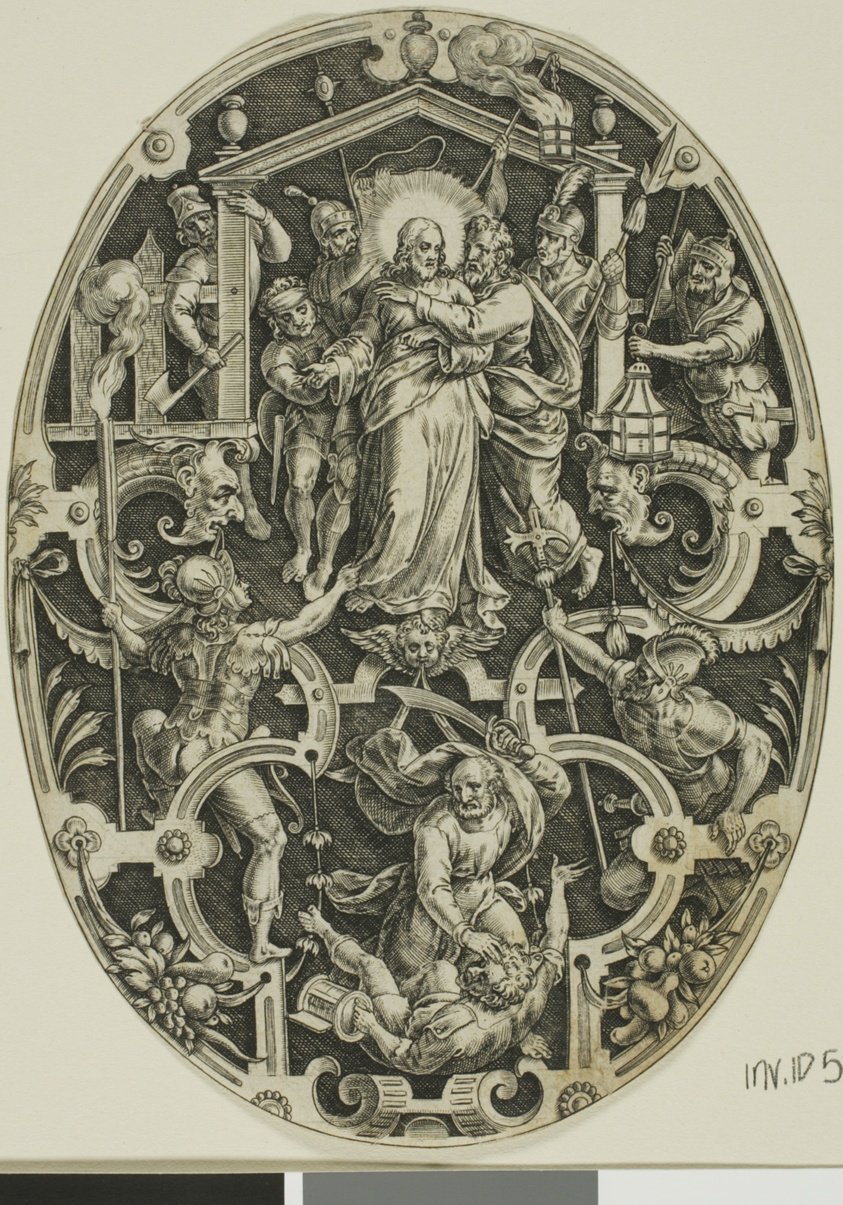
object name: Print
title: Betrayal of Christ, from Passion of Christ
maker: Jan Sadeler, the Elder (Flemish, 1550-1600); after Marcus Gheeraerts, the Elder (Flemish, c. 1520-c. 1590)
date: 1575/1600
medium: Engraving in black on ivory laid paper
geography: Flanders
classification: engraving; print; prints and drawing